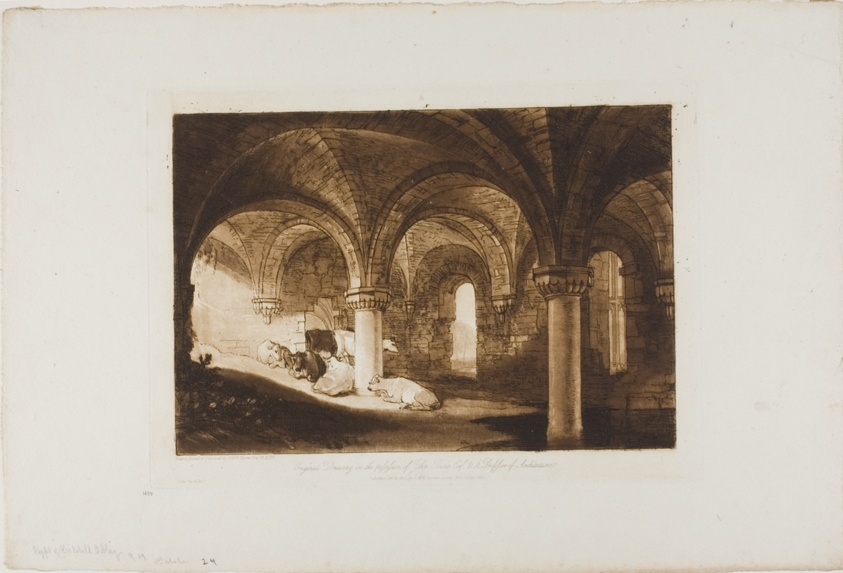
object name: Print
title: Crypt of Kirkstall Abbey, plate 39 from Liber Studiorum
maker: Joseph Mallord William Turner (English, 1775-1851)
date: published February 11, 1812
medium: Mezzotint and etching in brown on ivory paper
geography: England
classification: etching; print; prints and drawing